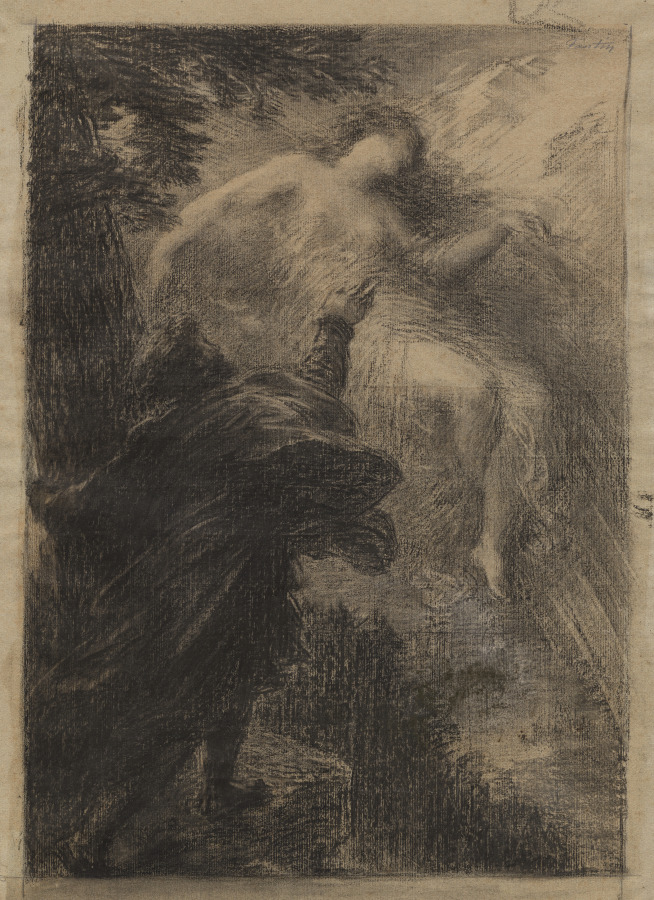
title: Fairy of the Alps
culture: France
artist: Henri Fantin-Latour (French, 1836–1904)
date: c. 1885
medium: charcoal with white chalk and black chalk, with framing lines in black crayon and squaring marks in graphite, on laid paper discolored to tan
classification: Drawing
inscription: signed, upper right, in charcoal: Fantin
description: Henri Fantin-Latour’s drawings featured imaginative compositions, often inspired by the music of contemporary German composers. This sheet relates to the symphonic work Manfred by Robert Schumann (1848), a drama in which Manfred encounters apparitions while mourning his lost lover. Fantin used layers of dark charcoal to evoke the emotional tenor of his subject and to translate the experience of listening to Schumann’s music using a visual medium.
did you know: This drawing relates to a print of the same year. Fantin used this sheet to work out his composition before completing a drawing on tracing paper, which was then used to transfer the image to a lithographic stone.